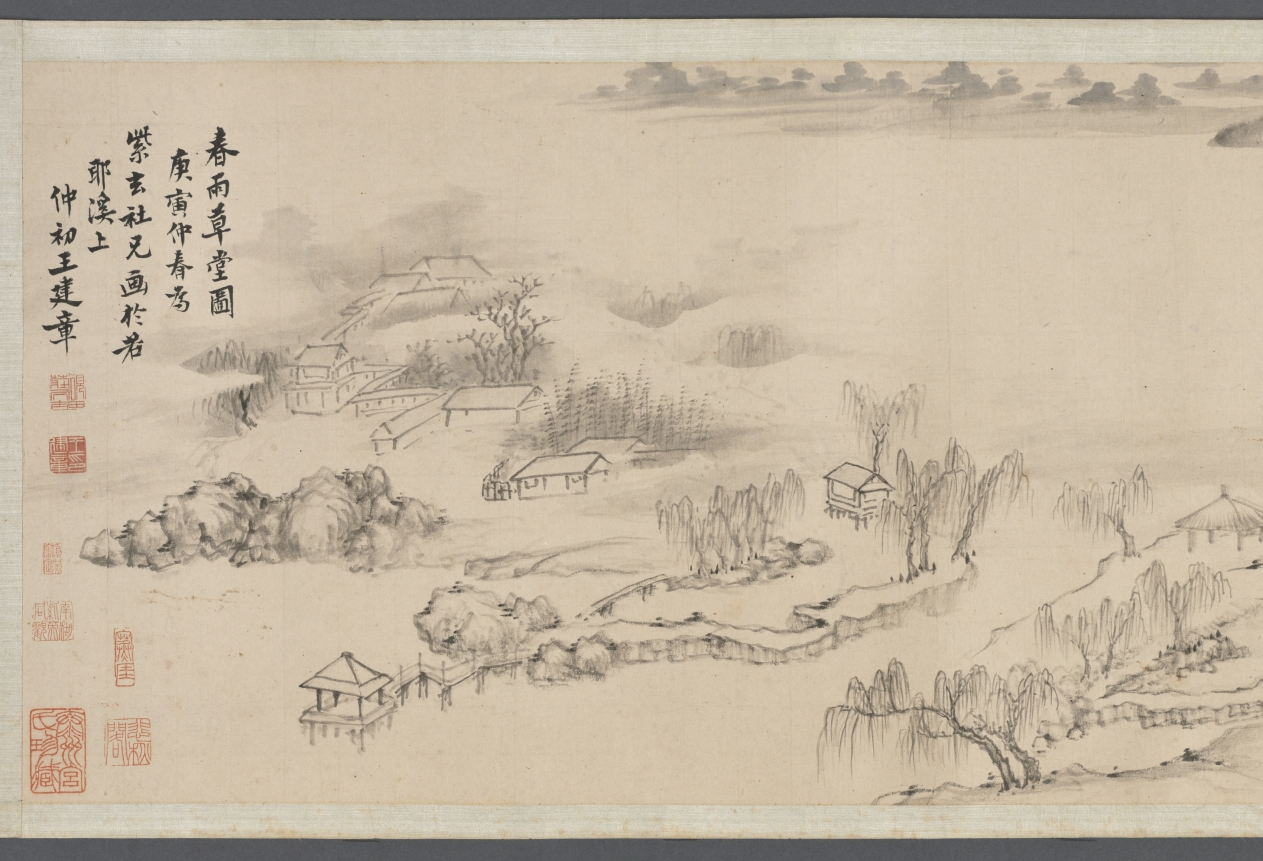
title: Spring Rain Thatched Hut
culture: China, Qing dynasty (1644-1911)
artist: Wang Jianzhang (Chinese, active 1621–1662)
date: 1650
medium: handscroll, ink on paper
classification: Drawing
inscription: Title by Wu Zhiying 吳芝瑛 (1868–1933), dated 1910.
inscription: 春雨草堂圖。庚寅仲春，為紫玄社兄畫於若耶溪上。 仲初王建章。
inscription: 12 colophons by Gong Weiliu’s 宮偉鏐 (1611–1680) contemporaries: Fang Gongqian 方拱乾 (1596–1667, jinshi of 1628); Jiang Cai 姜埰 (1607–1673); Liang Yizhang 梁以樟 (1608–1665); Du Shaokai 杜紹凱 (also named Du Jie 杜岕, 1617–after 1689), dated 1648; Zhao Kaixin 趙開心 (d. 1663), dated 1647; Zhao Erbian 趙而忭 (d. 1658); Yu Yaoguang 余耀光, dated 1649; Yao Quan 姚佺, dated 1648; Chen Taisun 陳台孫 (b. 1611, jinshi of 1640); (Monk) Shao 韶; Du Zhujin 杜祝進; and Tang Shi 唐時.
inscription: 此研田莊居士王建章為先太史紫元公所作春雨草堂圖也。居士字仲初，明崇禎間人，與先太史及惲香山相友善。喜畫佛像，自謂不讓李公麟。山水祖述董源，筆力雄健，有不可羈勒之概。香山稱其墨有五采，非世人所知。然性廉重，非同志不輕落筆，人得其寸圖尺縑，必相與忻賞，如獲蜼彝兕敦，非人世間物也！見先太史筆記，此圖寫雨景，而氣韻生動，勃勃於不能止。每一展覽，覺滿紙雲烟，墨瀋猶濕，如寫吾先人胸中未盡之邱壑也。圖後題詠，多一時名手，想見文采風流之盛。迄今二百餘年，舊德先疇，遺風未沫。吾子孫其永寶之，如與吾先人接謦咳於一堂，為感思之助，其敢作圖畫觀乎！同時香山亦有圖佚去己久，不知異日能為延津之合否。壬申長夏本昂重裝敬識。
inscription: Collectors' seals including: Gong Ben'ang 宮本昂 (1821–1874); Lian Qian 廉泉 (1868–1932); Wu Zhiying 吳芝瑛 (1868–1933)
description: With its striking simplicity, this painting captures the pure serenity of a private garden in the moist atmosphere of a spring morning on a small river. Painted in the style of Ni Zan, Wang Jianzhang dedicated this work to his patron-friend Gong Weiliu (1611-1680). Gong retired from government service after the fall of the Ming dynasty and constructed a garden-retreat at his native home in Taizhou, Jiangsu province. He invited scholars and poets from his literary society to contribute writings of his estate, which are here mounted together with the painting in this scroll.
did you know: Gong Weiliu, the owner of the estate portrayed here, had received his prestigious jinshi degree in 1643, but his official career was thwarted by the collapse of the Ming dynasty the following year.